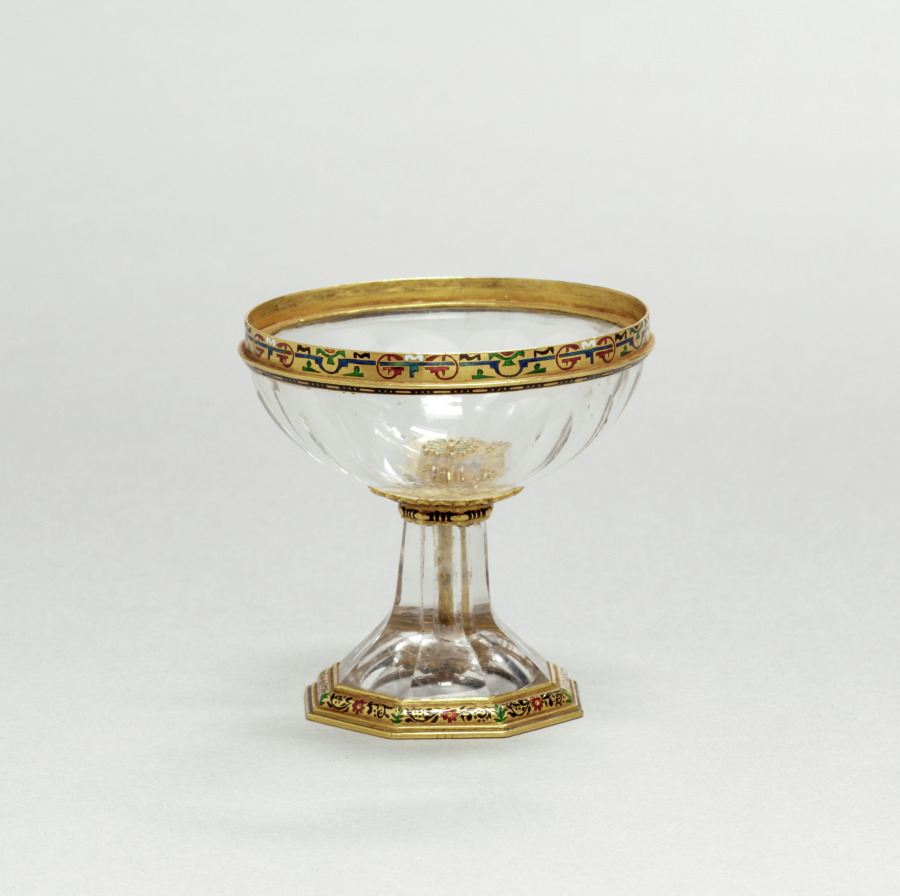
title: Double Cup (Upper Cup)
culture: Italy, late 16th century (possibly 19th century forgery or 16th and 19th century pastiche)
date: late 16th century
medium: rock crystal set in enameled gold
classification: Enamel